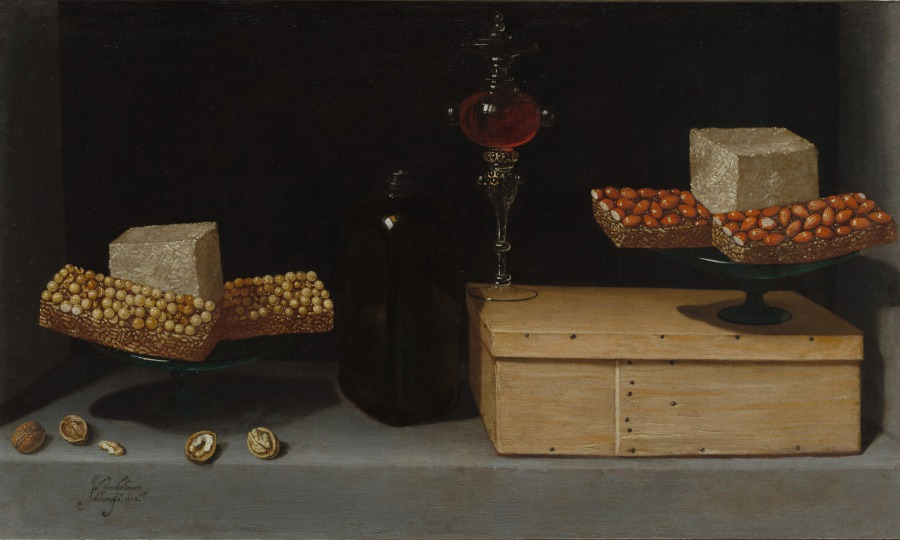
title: Still Life with Sweets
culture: Spain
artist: Juan van der Hamen y Léon (Spanish, 1596–1631)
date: 1622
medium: oil on canvas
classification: Painting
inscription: Signed lower left: "Ju Vander Hamen/ de Leon fa[t], 1622"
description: Placed on a simple stone ledge, this bold arrangement includes a wooden box, a dark glass bottle, some walnuts, an elaborate Venetian glass, and several sweets called turrones. These delicacies are a mixture of pine nuts, honey, almonds, and hazelnuts. The picture may not represent an actual meal or snack. Rather, the artist played with contrasts and harmonies of shapes, textures, and colors. During his short career van der Hamen, whose father was from the Netherlands, worked at the Spanish royal court and created biblical pictures, history paintings, allegories, and landscapes. He is best known for his portraits and still lifes.